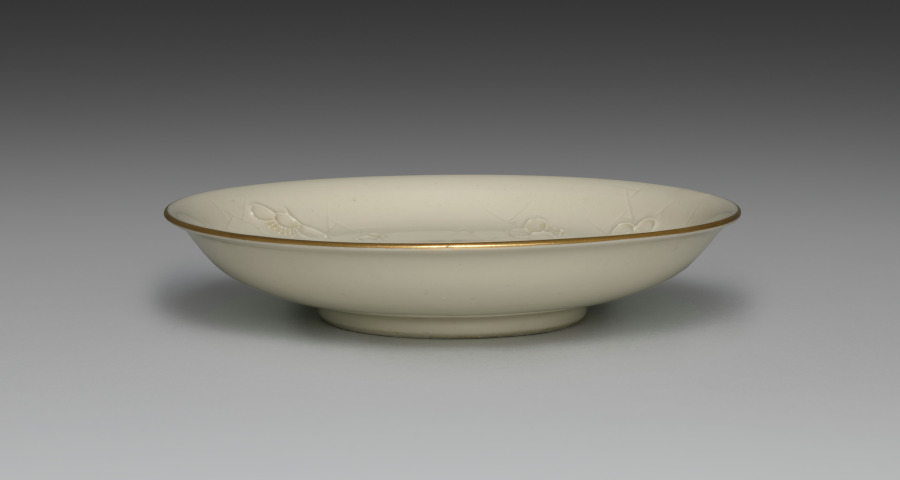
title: Medium-sized Dish from Dining Set with Plum Blossoms and Cracked-Ice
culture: Japan, Meiji period (1868–1912)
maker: Seifū Yohei II (Japanese, 1844–1878)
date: c. 1875–78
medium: Porcelain with molded designs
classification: Ceramic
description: Each item in this set has a delicate low-relief design of flowering plum branches over scattered, intersecting lines meant to resemble the cracked-ice surface of a frozen body of water and is signed on the base in gold pigment. While Yohei II produced many fine works in underglaze blue, like those produced by Kiyomizu Shichibei, he also made works in quite different styles later in his career, from the early 1870 s. In 1873, he was appointed purveyor to the Industrial Center of Kyoto Prefecture, a designation associated with Kyoto’s efforts to reach an international market through the port of Kobe; and from 1875 until his death, he was involved in national-level projects to present Japanese ceramics across the world. It was during this period that Yohei III was apprenticed to Yohei II, and it has been suggested that this set may in fact be an early example of Yohei III’s work, which he signed with his teacher’s name. Decorated with flowers resembling Japanese textile motifs, the set calls to mind the design of Yohei II’s pair of vases with plum blossoms in the Victoria and Albert Museum. Here, the elaborate trees created for a formal public exhibition setting have been translated into the approachable blossoms of the genteel domestic environment. While the designs are consistent across the pieces, each raised flower petal and pistil and each incised line in the ice was done by hand, so the cups, bowls, and dishes are similar yet unique. The bottoms of two boxes once identified the set’s owner, but the information has been deliberately obscured with black ink. However, inscriptions still visible appear to indicate two occasions, once at the end of July 1886 , and once again in June 1916 , when parts of the set were requested from Hokura in Niigata Prefecture. The location corresponds to a neighborhood in the present-day city of Jōetsu. The surname Tsuji 辻 also appears on a paper tag affixed to one of the box cloths. Future research may possibly reveal more about their provenance. A vase by Yohei III in a private collection combines the formal grandeur of the Yohei II vases in the Victoria and Albert Museum with the gentler design of this dining set, placing flowering plum trees against soft, scalloped-edge clouds resembling those in golden screens.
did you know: The dining wares have a creamy white coloration that the four boxes containing them identify as Korean in style.